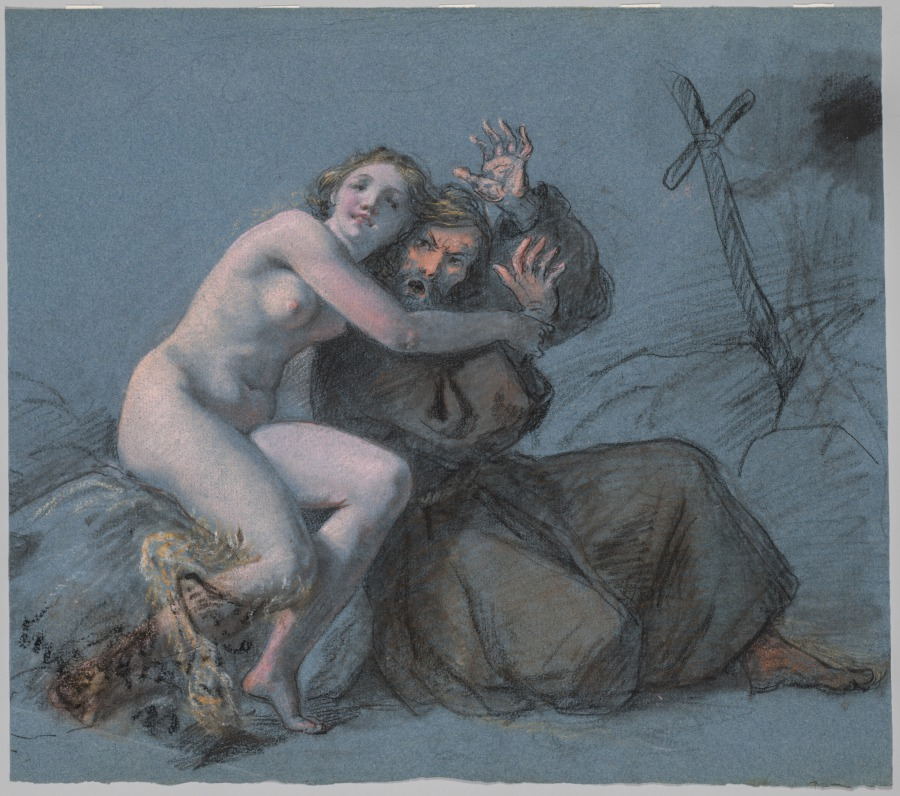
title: The Temptation of St. Anthony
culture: France, 19th century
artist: Julien Léopold Boilly (French, 1796–1874)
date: 19th century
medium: Black chalk with white, pink, orange, ochre, and brown chalks on blue paper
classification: Drawing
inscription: verso: lower right corner, in graphite: 8 (inscribed in circle)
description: Boilly’s scene represents the Temptations of Saint Anthony, a biblical subject. While embarking on his desert pilgrimage through Egypt, Anthony experienced a series of supernatural trials. Here, Boilly illustrated a nude nymph attempting to seduce him. Anthony’s horrified reaction to the woman’s embrace and the prominent crucifix on the right create a humorous juxtaposition between piety and lustful desire.